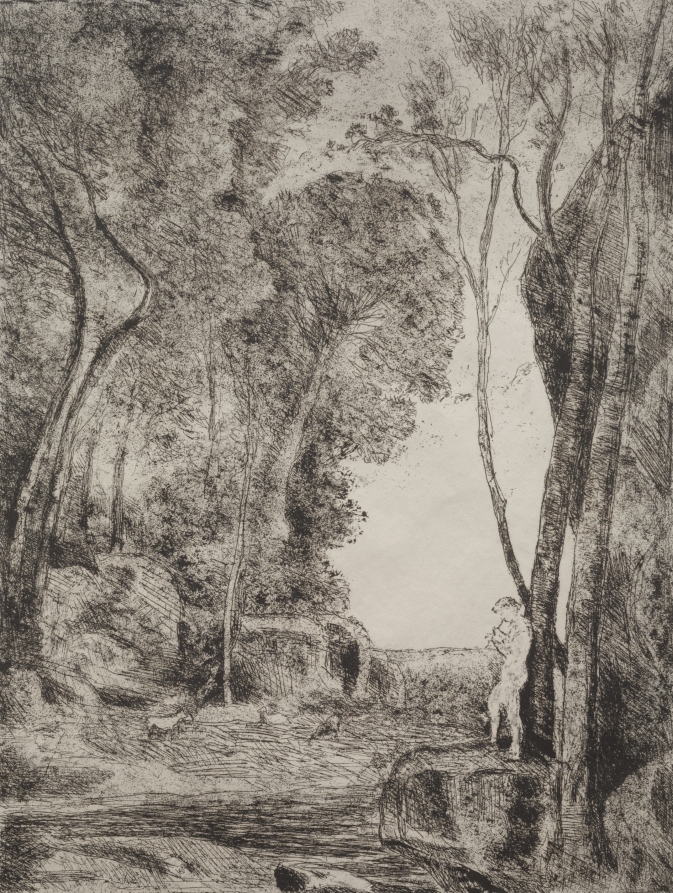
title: The Little Shepherd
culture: France, 19th century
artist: Jean Baptiste Camille Corot (French, 1796–1875)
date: original impression 1855, printed in 1921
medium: cliché-verre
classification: Print